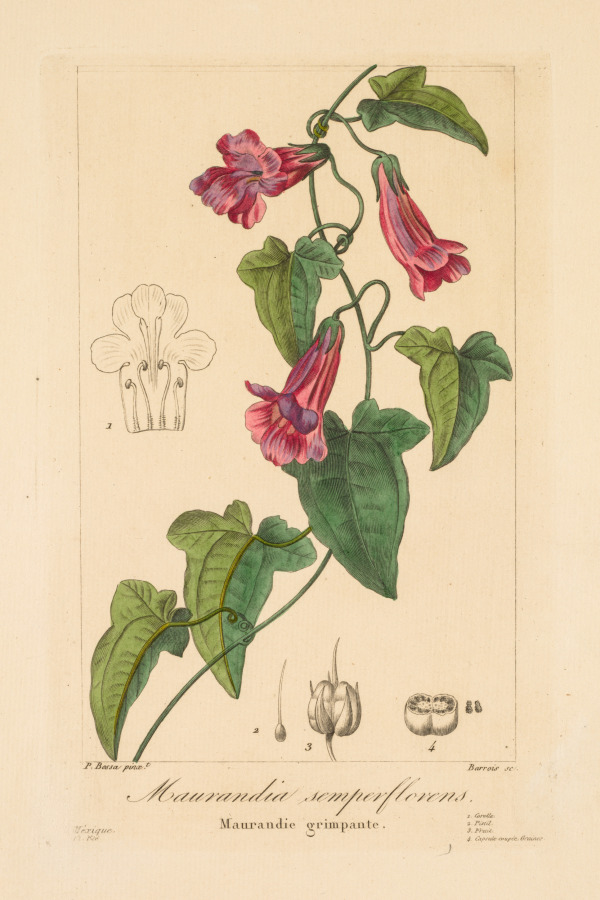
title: Flore des Jardiniers, Amateurs et Manufacturiers: Maurandia semperflorens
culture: France, 19th century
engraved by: Jean Pierre Frederic Barrois (French, 1786–after 1841)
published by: Pancrace Bessa (French, 1772–1846)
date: 1836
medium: engraving, hand-colored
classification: Print